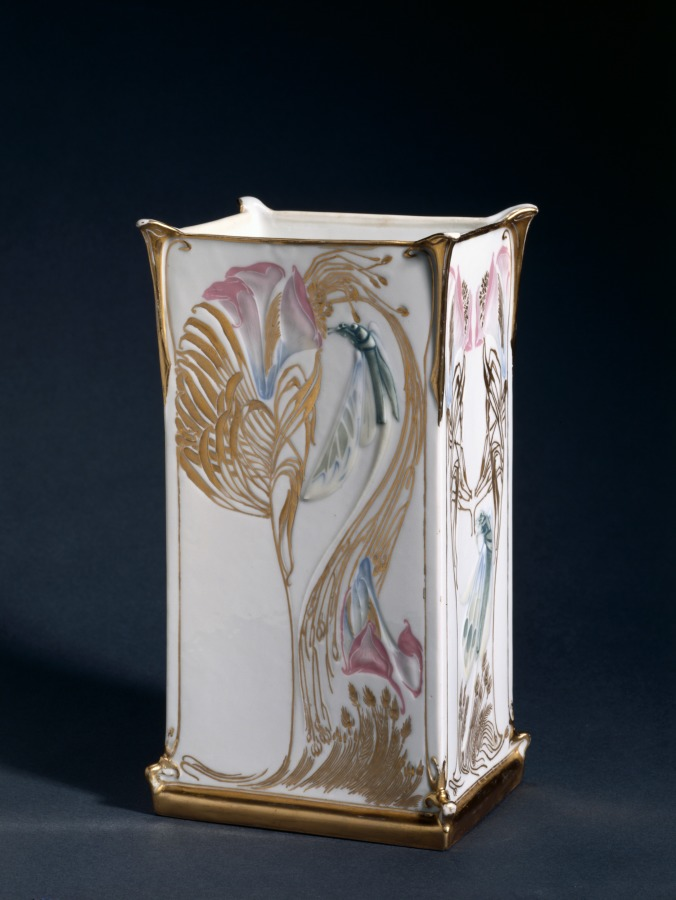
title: Vase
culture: France, Limoges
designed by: Georges de Feure (French, 1868–1943)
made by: Gérard, Dufraissex and Abbot (French)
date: c. 1903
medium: porcelain with colored glazes and gilding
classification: Ceramic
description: The porcelains that de Feure conceived for execution by a Limoges factory represent perhaps the finest of all wares fabricated in this medium and done in the art nouveau style. This vase is particularly distinguished because of its beautiful glazes and gilding. A painter and graphic artist of considerable accomplishment, de Feure worked within the artistic modes of Symbolism and French art nouveau. In the years around 1900, he was employed by Samuel Bing to supply decorative arts for his Parisian firm, L'Art Nouveau. The artist designed furniture and ceramics for Bing, including this vase.